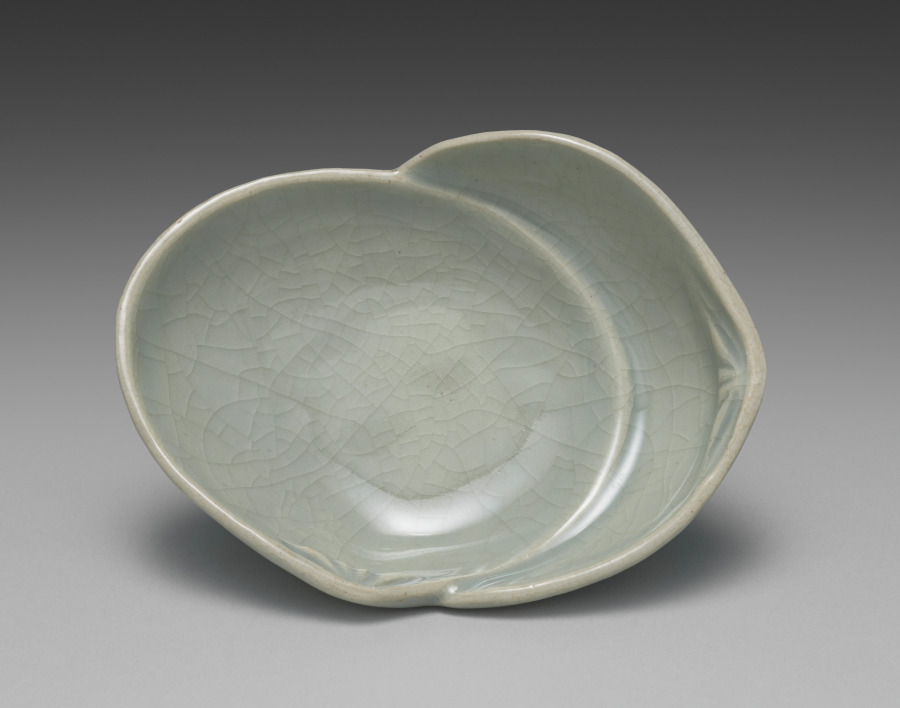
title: Dish from Dishes with Matching Shells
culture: Japan, Meiji period (1868–1912)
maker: Seifū Yohei III (Japanese, 1851–1914)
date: 1893–1914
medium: One of a pair of dishes; porcelain with celadon glaze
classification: Ceramic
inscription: 清風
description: Yohei III’s main output for his sophisticated clientele was in the form of tea sets and dining sets. He created a range of dishes in green glazes. He often produced in pairs, sets of five, or sets of ten. This pair of shell dishes have a box lid interior attestation by Yohei IV that the dishes were made by Yohei III with a cracked-ice (hyōretsu) pattern in the glaze, omitting reference to any glaze coloration.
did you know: These shell-shaped dishes are of the saucer type, suitable for dipping sauces.